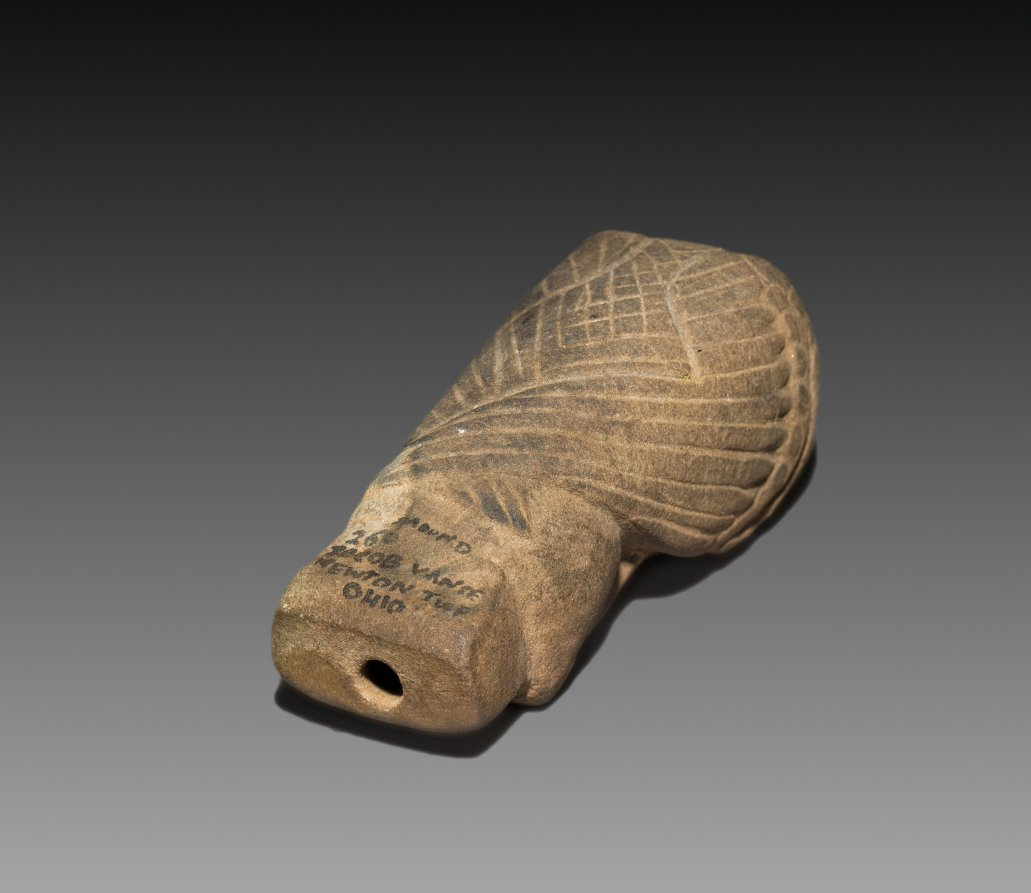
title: Bird Effigy Pipe Fragment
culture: Native North America, Adena people, Vance Mound, Newton Township, Licking County, Ohio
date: 400 BCE–100 CE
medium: sandstone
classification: Sculpture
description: The modest appearance of this small bird-effigy pipe, its head now lost, is misleading—the carving is fine and imagery, complex. The upper part takes the form of a bird’s body, the wings folded over the back. The section beneath the bird’s breast, intact but difficult to read, may depict a human torso with a pronounced navel and upraised forearms and hands, the palms facing outward. If so, one creature could be carrying or transforming into the other. The pipe was created by an artist of the ancient Adena people of southern Ohio. Smoke traveled through an interior channel to the mouthpiece, a small hole on the underside.